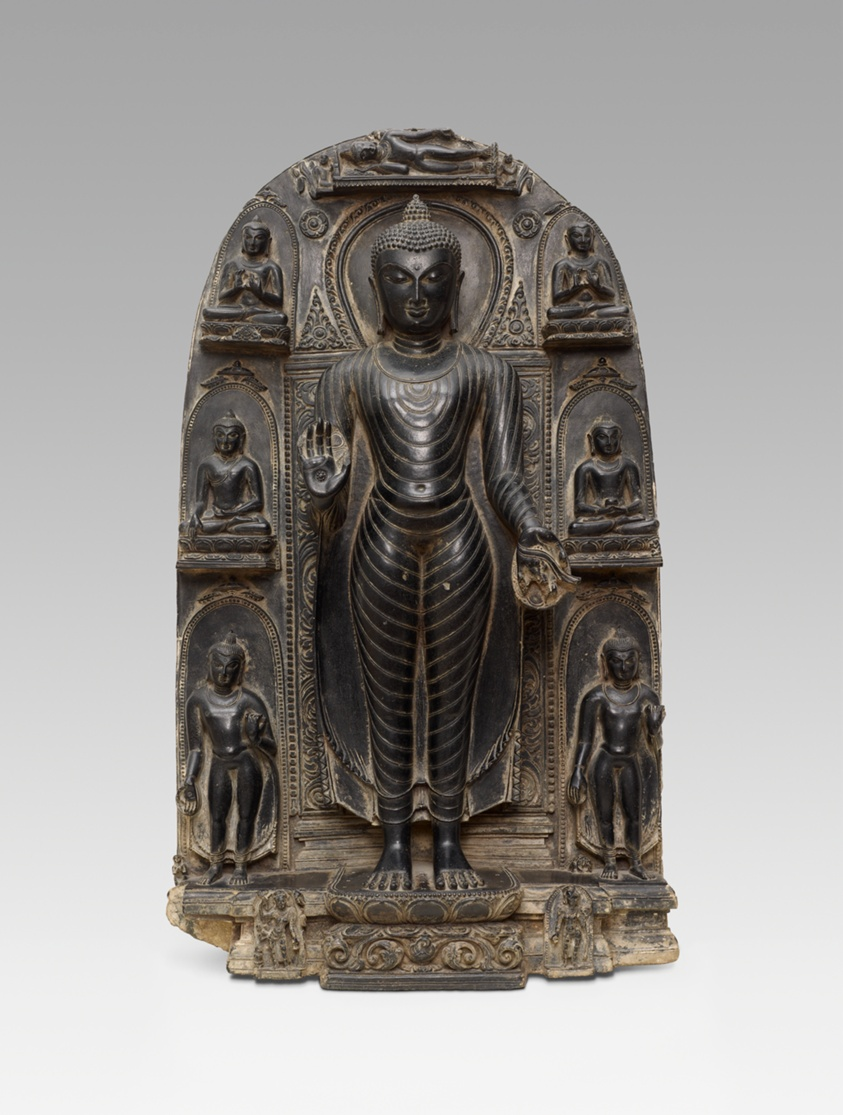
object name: Sculpture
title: Eight Great Events from the Life of the Buddha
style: South Asian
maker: India; Bihar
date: Pala period, 10th century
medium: Phyllite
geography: Bihar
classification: sculpture; asian art